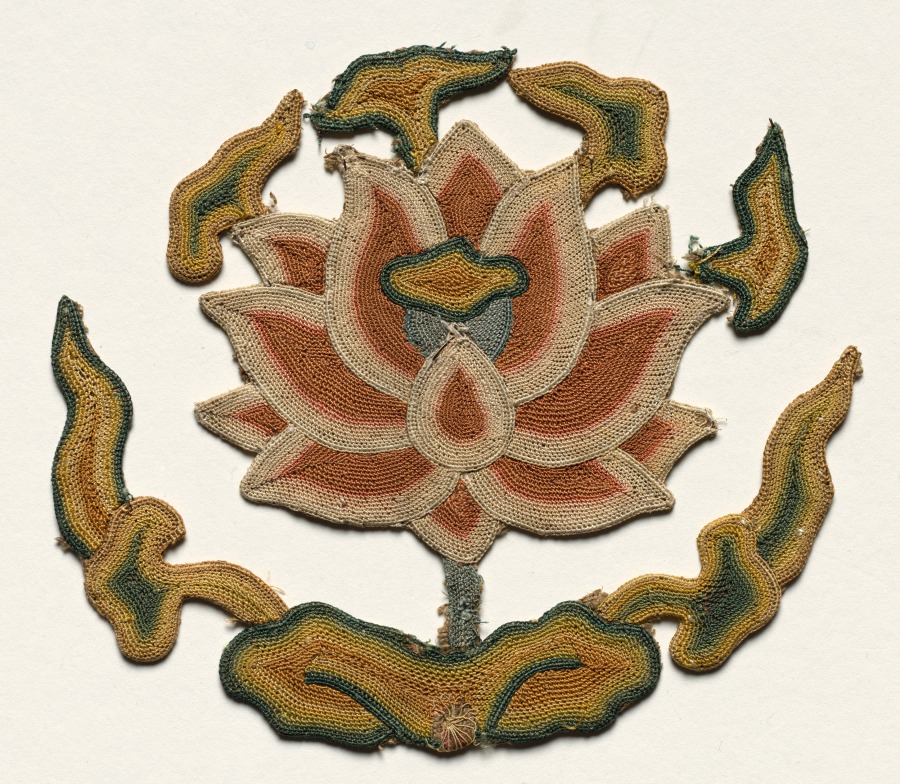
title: Fragment of Lotus Flower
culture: China, 14th century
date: 1300s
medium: Silk and gold thread: embroidery, needlelooping; silvered and gilded paper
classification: Embroidery